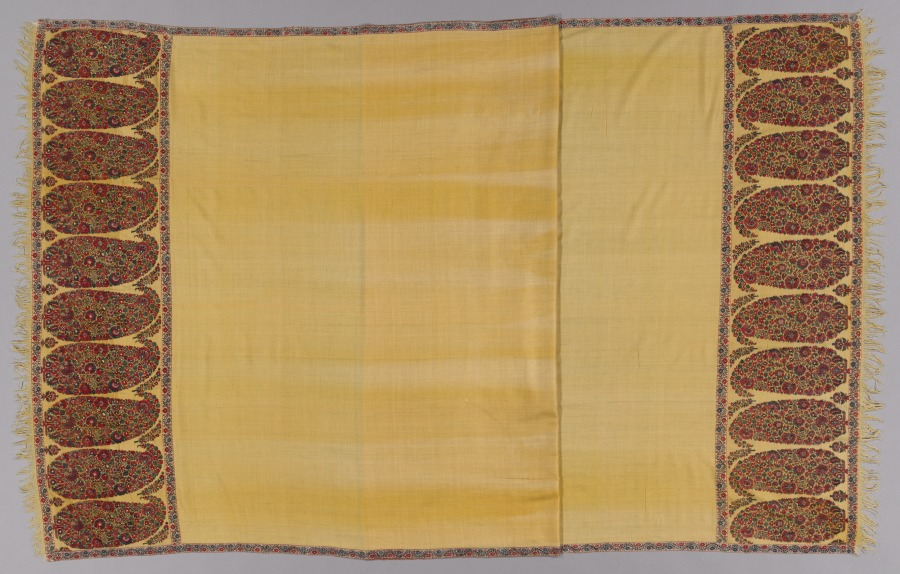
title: Yellow Long Shawl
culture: India, Kashmir, Afghan period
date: before 1815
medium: 2/2 twill tapestry weave [S], double interlocking; wool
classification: Textile